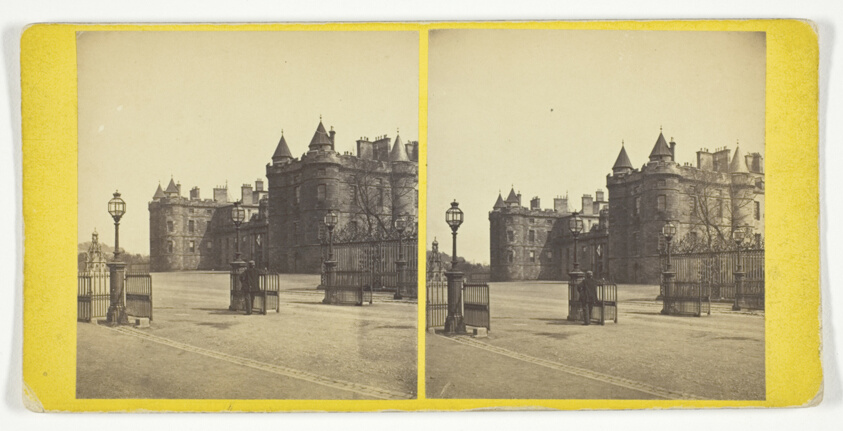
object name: Photograph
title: Holyrood Palace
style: 19th century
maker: G. W. Wilson (Scottish, 1823–1893)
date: Mid 19th century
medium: Albumen print, stereo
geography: Scotland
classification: photography; photograph